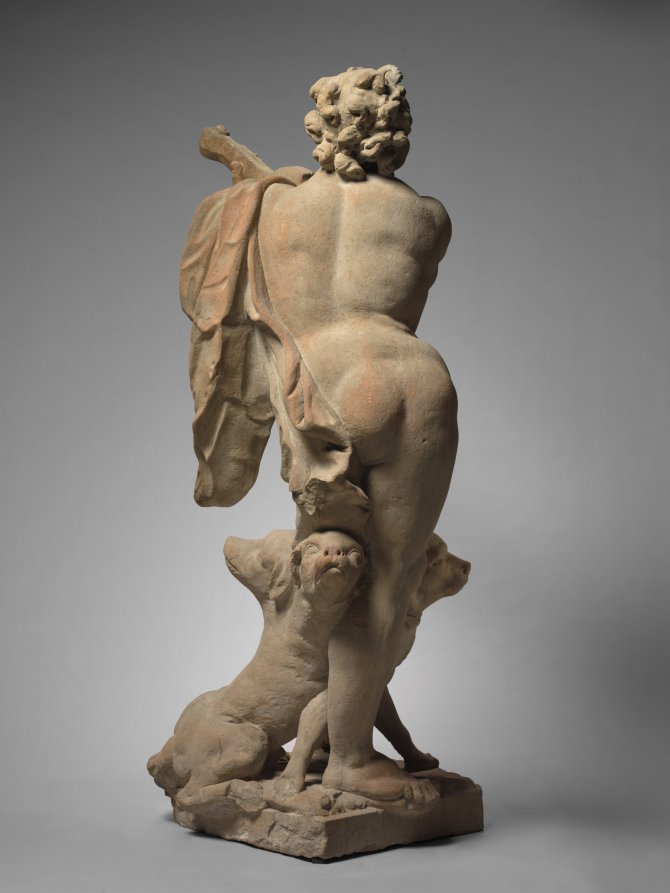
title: Orpheus and Cerberus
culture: Germany, near Bamberg, 18th century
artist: Ferdinand Tietz (Austrian, 1708–1777)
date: c. 1765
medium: sandstone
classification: Sculpture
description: This work was one of numerous sculptures Tietz created for the gardens of Schloss Seehof, near Bamberg in Bavaria (Germany), the summer residence of the Prince Bishops of Bamberg. The exaggerated forms of Orpheus's face and musculature caricature the idealized proportions of classical sculpture. A further parody exists with his companion: the usually terrifying hound Cerberus is here nothing more than a docile puppy, sitting calmly at Orpheus's feet. Meant to be viewed outdoors, on a high pedestal and from a distance, this work is less finely detailed than sculptures Tietz made for indoor settings at Seehof.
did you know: Taught to play the lyre by the Greek god Apollo, Orpheus's legendary musical abilities had the power to charm animals.